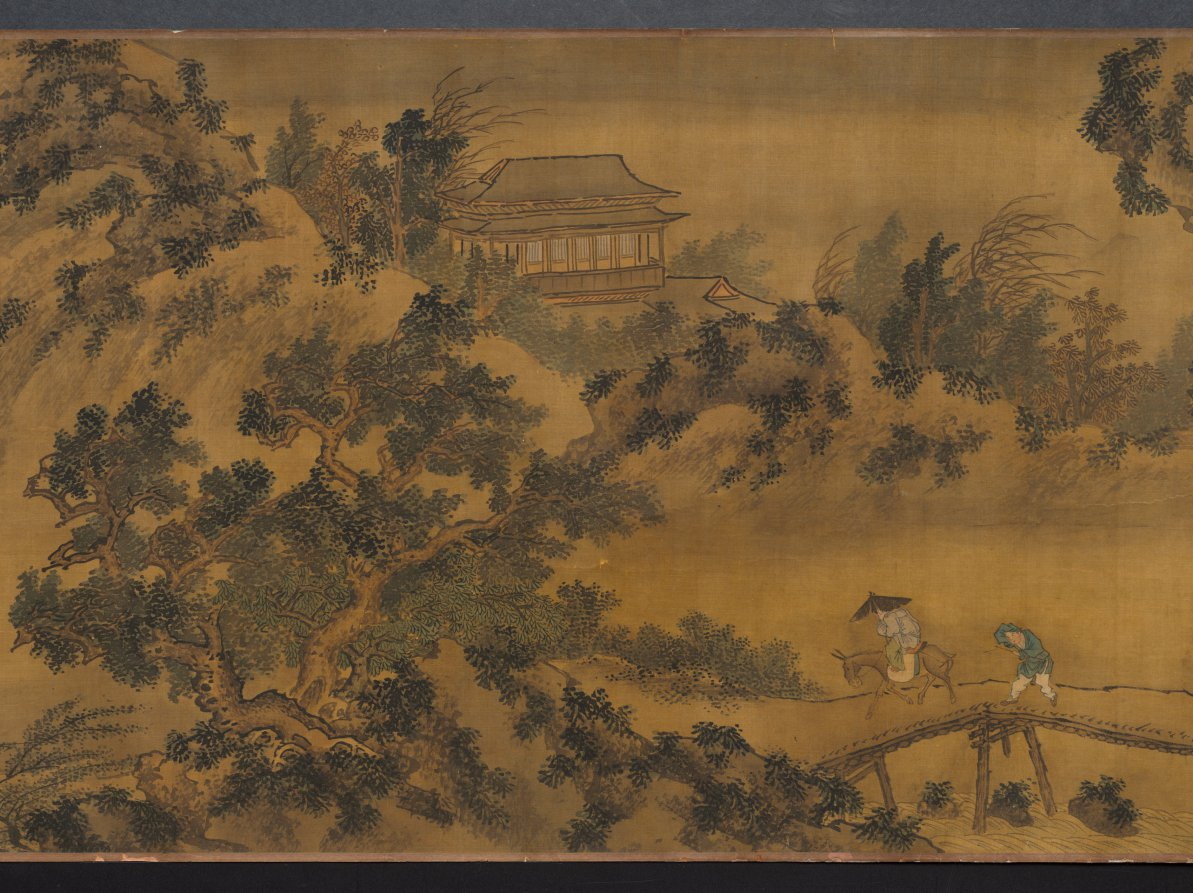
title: Returning to the Village in a Rainstorm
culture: China, Ming dynasty (1368–1644)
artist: Xie Shichen (Chinese, 1487–after 1567)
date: 1530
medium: Handscroll; ink and light color on silk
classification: Painting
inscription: 風雨歸村圖 嘉靖庚寅秋日樗仙謝時臣. [印] 謝時臣印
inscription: 3 additional seals unidentified.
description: This scroll depicts a wind- and rainswept landscape with figures in the countryside struggling against a late summer monsoon rainstorm. Such weather was familiar to residents of the lower Yangzi delta. Xie Shichen spent most of his life in the Suzhou area. Details of his career are scant, but his surviving works suggest that he made his living as a professional painter. This painting conveys drama and anecdotal observations, characteristic of Zhe school paintings, such as the one by Lü Wenying, CMA 1970.76.